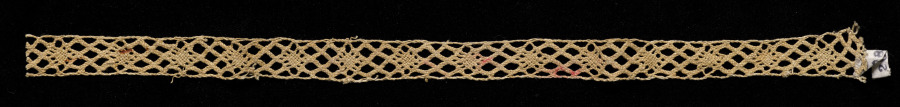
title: Lace Insertion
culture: Italy, Venice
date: 1540–60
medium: Bobbin lace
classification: Lace